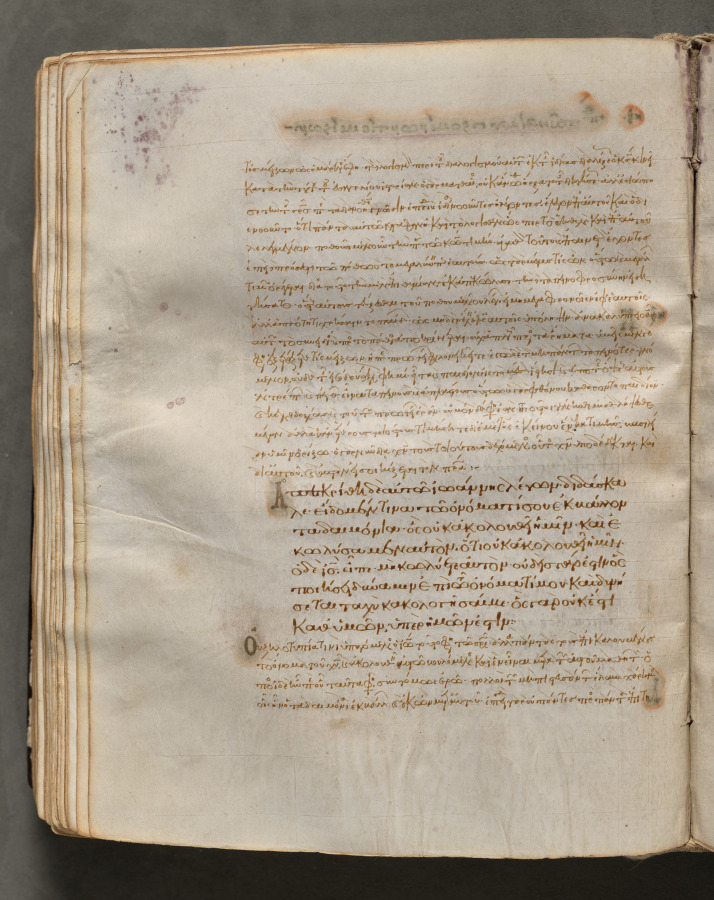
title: Text, folio 165 (verso), from a Gospel Book with Commentaries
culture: Byzantium, Constantinople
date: c. 1000–1100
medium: ink, tempera, and gold on vellum; leather binding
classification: Bound Volume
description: Each of the four gospels in this book opens on a page with brilliantly illuminated borders depicting the author of the text as well as birds-principally peacocks, symbols of the immortality of the soul-and fountains, representing the fountain of life and the salvation of the soul. This volume consists of 428 leaves with texts in Greek. Its level of sophistication suggests that it was probably written and decorated in a monastery in Constantinople.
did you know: Gospel Books were carried in procession through Byzantine churches.